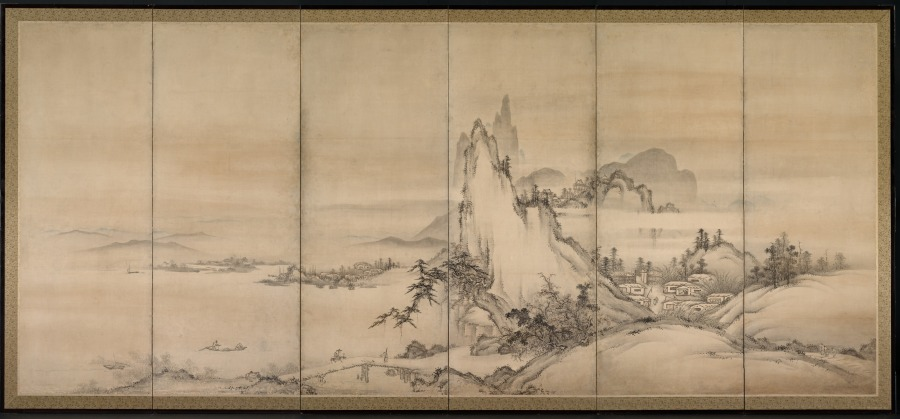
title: Chinese Landscape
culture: Japan, Muromachi period (1392–1573)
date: 1500s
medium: Pair of six-fold screens; ink and slight color on paper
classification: Painting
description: In a panorama of mountains and expanses of water, three gentlemen have assembled by moonlight to enjoy one another’s company away from a bustling village. An influx of ink paintings from China in both album and scroll formats beginning in the late 1200s inspired Japanese artists to create landscapes based upon Chinese prototypes. Later, Japanese painters adapted the imagery to the larger format of folding screens, which were used to define spaces in large rooms.